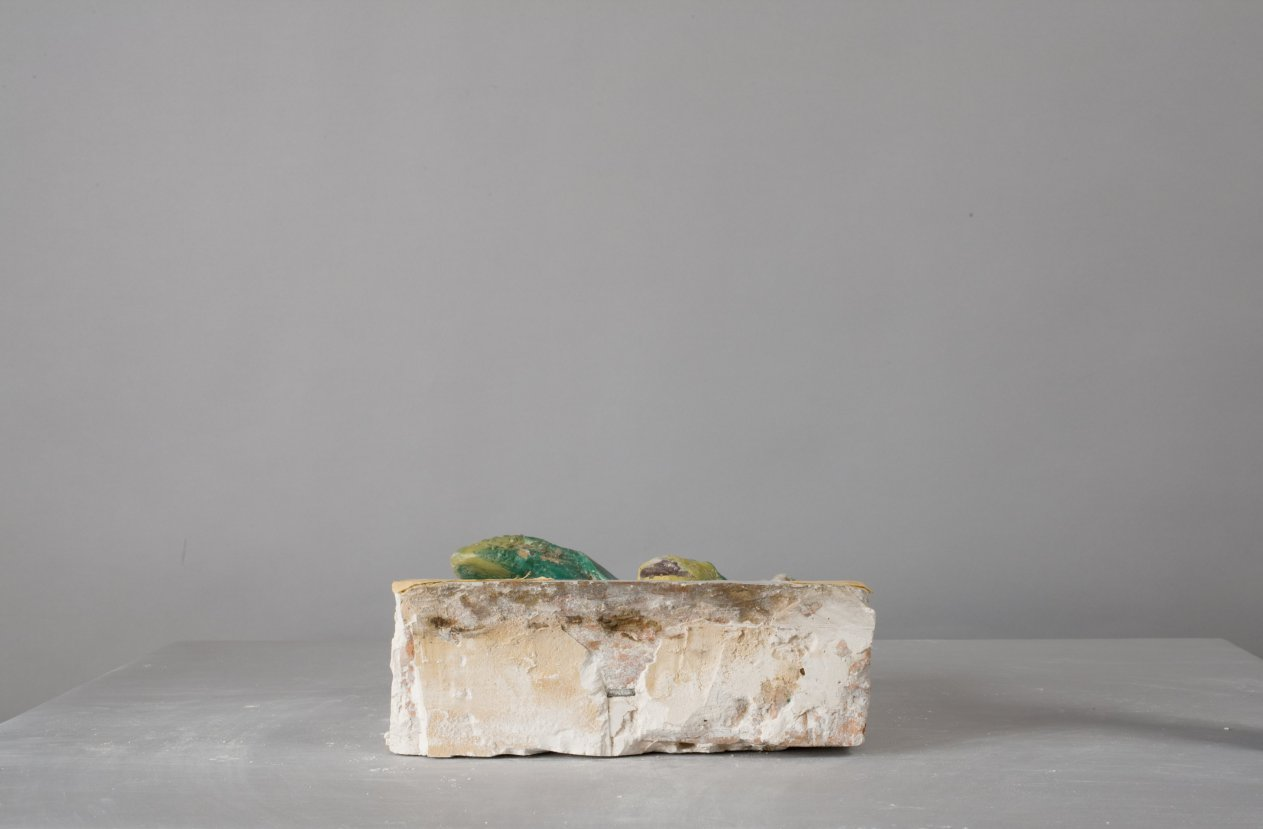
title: Fragment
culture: Italy, Florence, 16th century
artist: Benedetto Buglioni (Italian, 1461–1521)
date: c. 1900–1910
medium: glazed terracotta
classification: Sculpture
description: The Madonna sits upon a throne with the Christ Child standing on her knee. He is steadied by his mother, turning delicately to grasp the Virgin's robe for support. On the left is St. Francis, identified by his stigmata. On the right, St. Anthony Abbot is identified by his monk's robe and T-shaped walking stick. The brown robes of the saints, the purple of the Virgin's tunic (a shade characteristic of the artist), and the flesh tones of the figures contrast strongly against the bright blue background. In the semicircular sky behind the figures, three winged cherub heads emerge, representing a host of angels. The inclusion of St. Francis in this altarpiece honors the saint, suggesting that the altarpiece may have been originally built into the wall of a Franciscan institution in Tuscany. Two shields bearing the Borgherini family crest appear in the lower portion of the altarpiece's border, further suggesting that the chapel for which this altarpiece was made was likely owned or endowed by the family. Glazed terracotta is both durable and decorative and the gleaming white of this piece would have stood out in the darkness of a church. The medium was made popular by Renaissance artist Luca della Robbia and came into fashion as a substitute for expensive carved marble. A rounded arch frame embellished with fruit and flower garlands as well as egg-and-dart and cord moldings accompanied the work when it was acquired, but was later determined not to be original and removed. Buglioni's work bears the influence of the della Robbias, particularly in the simple color scheme. Buglioni likely worked in the studio of Luca's nephew, Andrea, where he would have learned the technique of glazing terracotta.